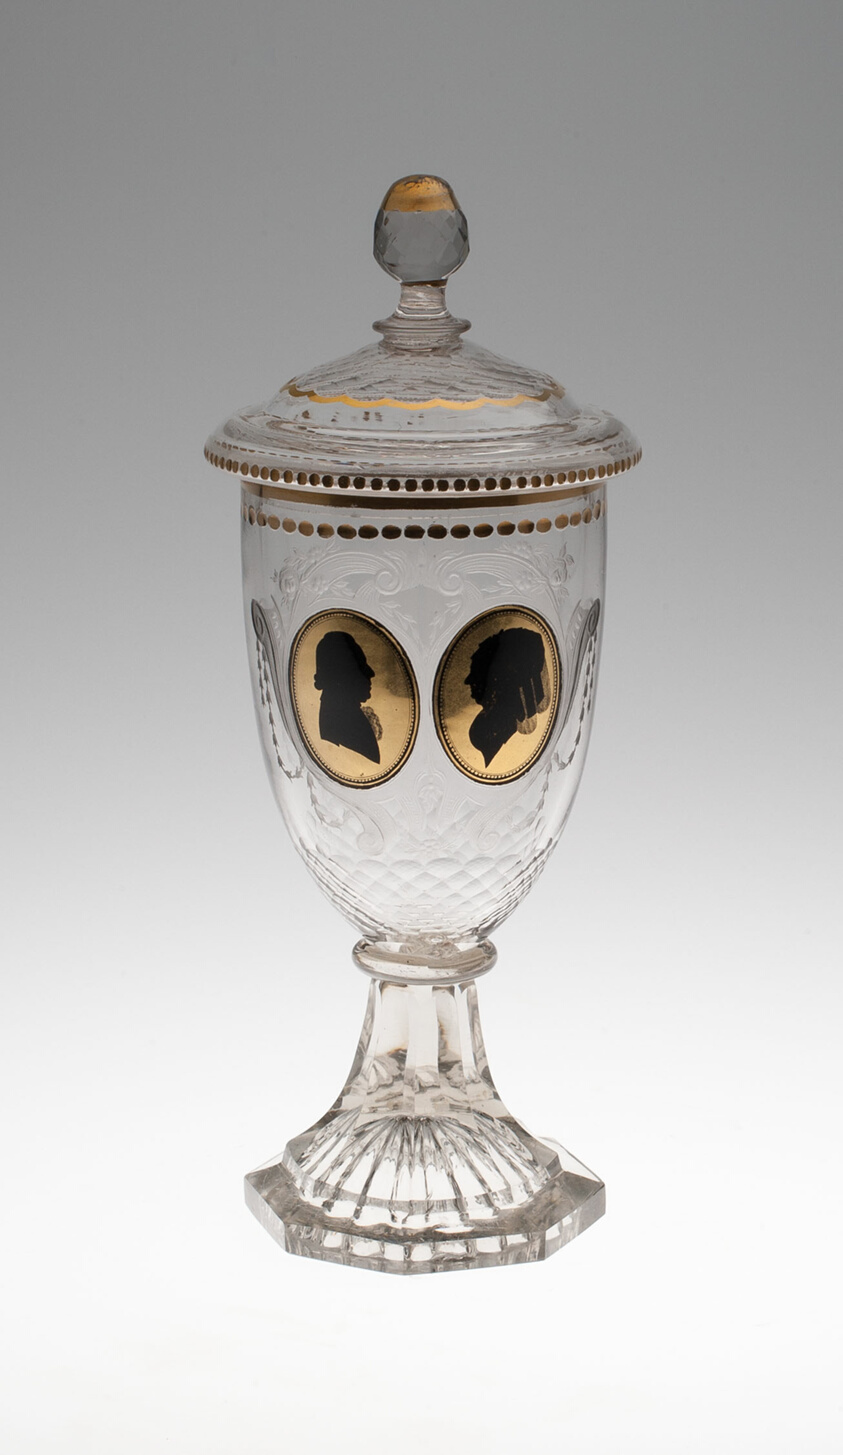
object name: Glass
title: Covered Goblet with Male and Female Silhouettes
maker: Germany, Silesia, Warmbrunn; Decorated by Johann Sigismund Menzel (German, 1744-1810)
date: c. 1795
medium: Glass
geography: Germany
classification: drinking vessel; glass; european decorative arts